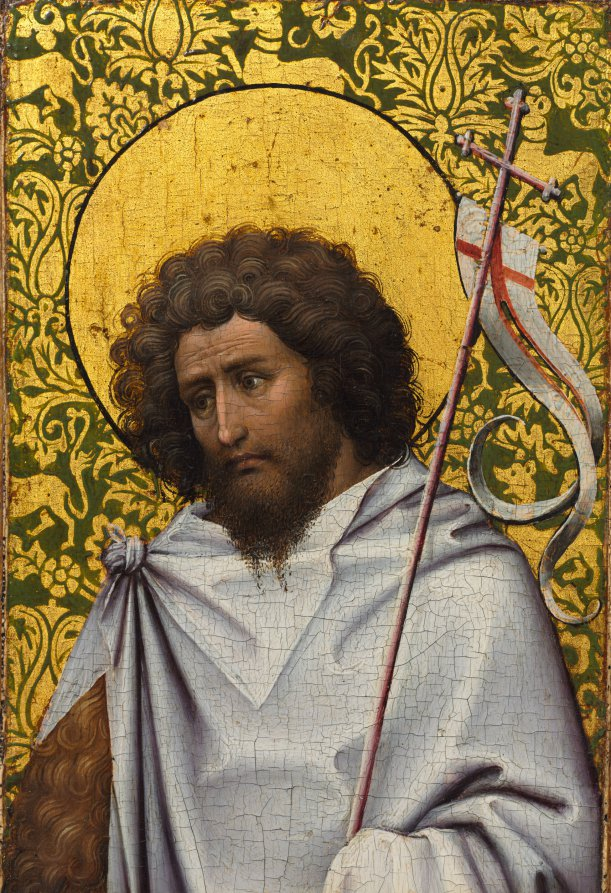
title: John the Baptist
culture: Flanders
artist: Robert Campin (Netherlandish, 1375/79–1444)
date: c. 1410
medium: oil on oak panel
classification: Painting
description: According to tradition, John the Baptist wears a hair shirt under a white cloth, associated with newly baptized Christians. The flag bearing a red cross symbolizes resurrection. In marked contrast, the background features a lavish gold-patterned silk. The display of such luxurious fabrics continues an ancient tradition of using the finest objects in the worship of God. This painting has been cut down along the lower edge and would have originally shown a full-length image of the saint. It was probably the right wing of a triptych, with John the Baptist gazing upon a central image of the Virgin and Child. Campin first settled in Tournai around 1405-6 as a free master of the guild of painters, and he bought citizenship there in 1410, which suggests he was born elsewhere. Although heavily indebted to contemporary masters of manuscript illumination, Campin displayed greater powers of realistic observation than any other painter before him. He was one of the first artists to experiment with the use of oil-based colors, in lieu of egg-based tempera, to achieve the brilliant color typical of this period.